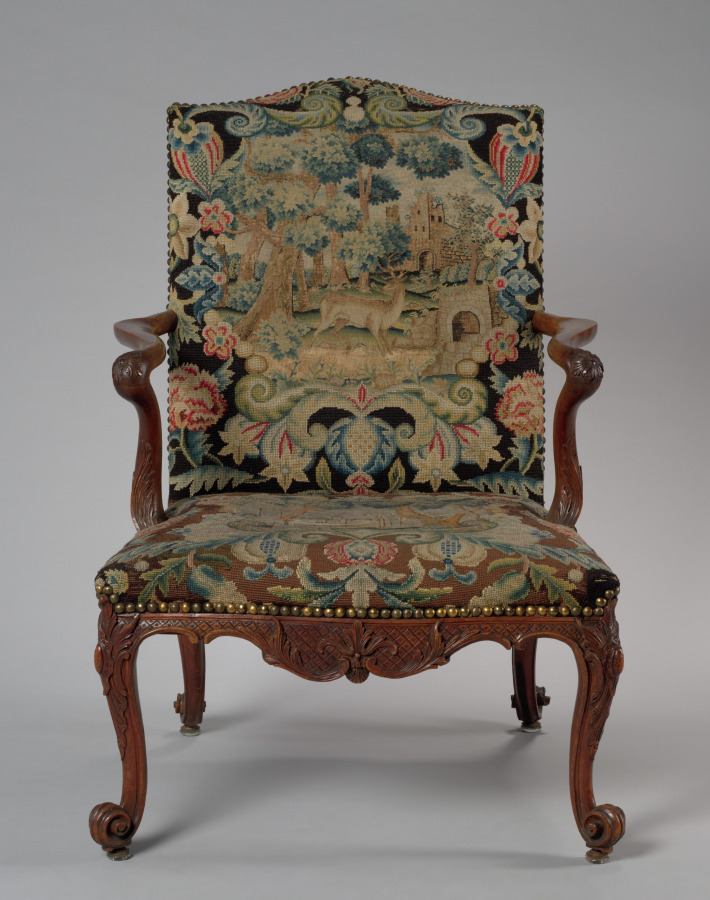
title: Armchair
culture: England, 18th century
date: 1760–1765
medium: mahogany upholstered in needlework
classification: Furniture and woodwork